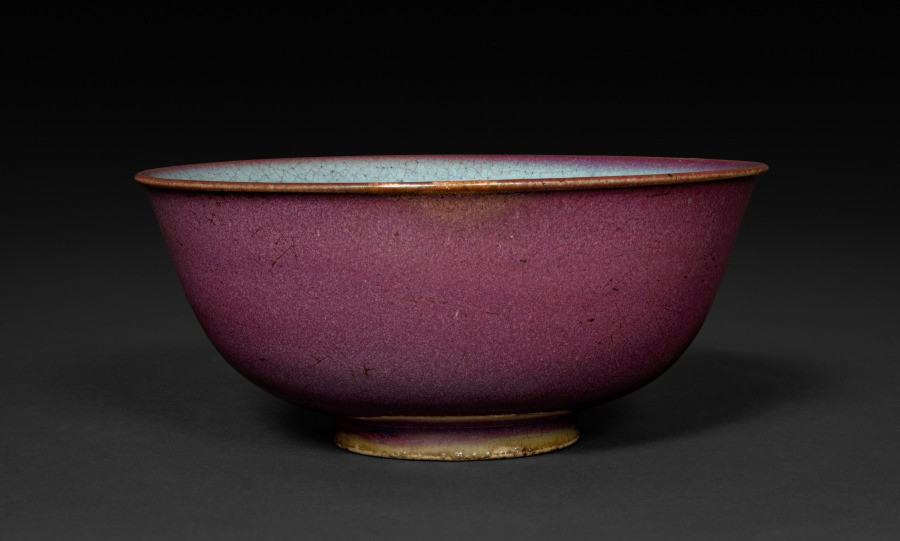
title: Bowl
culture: South China, Yuan dynasty (1271–1368) to Ming dynasty (1368–1644)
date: 1300s–1400s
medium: glazed gray stoneware, Jun ware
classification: Ceramic